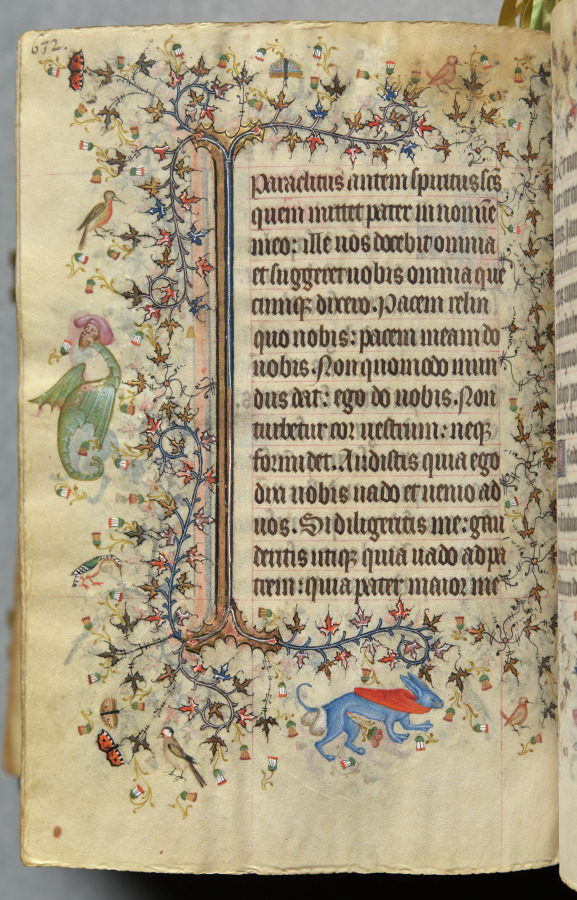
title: Hours of Charles the Noble, King of Navarre (1361-1425), fol. 310v, Text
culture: France, Paris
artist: Master of the Brussels Initials and Associates (French)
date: c. 1405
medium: ink, tempera, and gold on vellum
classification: Bound Volume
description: This precious volume was obviously highly prized by its owner, the French-born King of Navarre, who had his coat of arms painted on no less than twenty folios. Rather than directly commissioning this manuscript from a specific workshop, it seems that Charles the Noble acquired his book of hours -- perhaps ready-made for the luxury market -- while on a trip to Paris in 1404-05. A collaborative effort, six painting styles are evidenced within the pages of this codex, those of two Italians, two Frenchmen, and two Netherlanders. The painter who was responsible for the planning and decoration of the book, and who produced seventeen of the large miniatures, was a Bolognese artist known as the Master of the Brussels Initials. His principal assistant, responsible for most of the borders, was a Florentine who signed his name "Zecho" da Firenze on folio 208 verso.